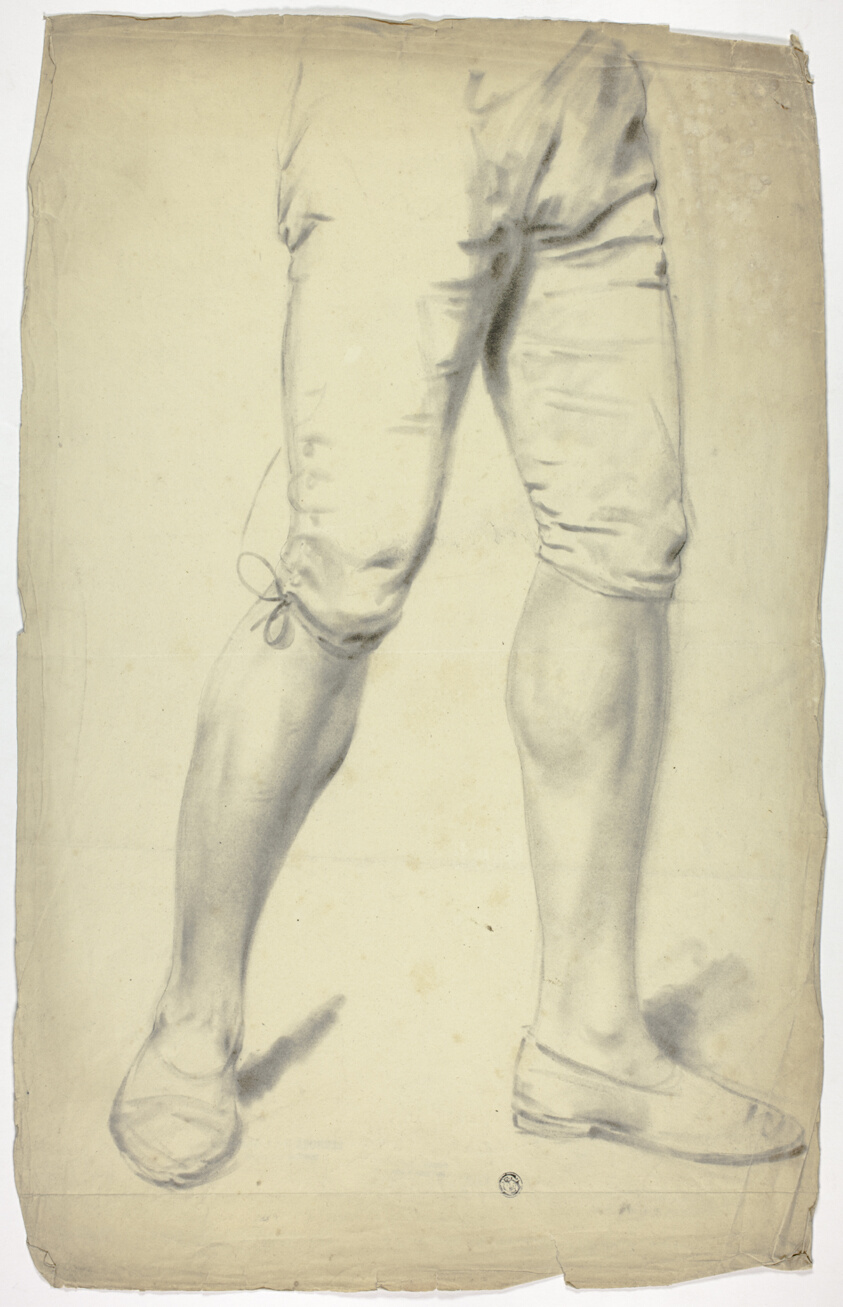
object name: Drawing and Watercolor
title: Legs of Boy Wearing Knickers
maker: John Downman (English, 1750-1824)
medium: Charcoal with stumping on cream wove paper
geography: England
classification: charcoal; paper; drawings (visual works); prints and drawing